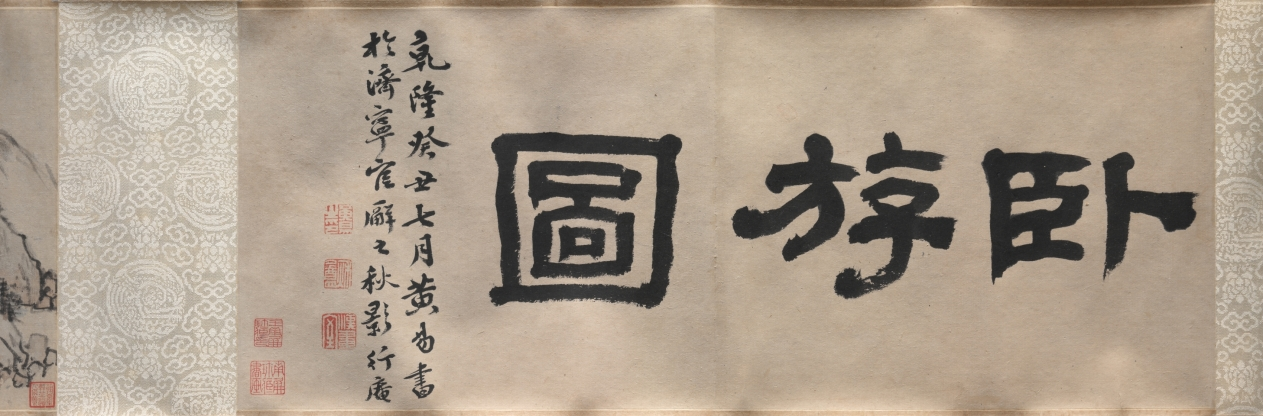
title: Dream Journey among Rivers and Mountains, no. 90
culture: China, Qing dynasty (1644-1911)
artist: Cheng Zhengkui (Chinese, 1604–1676)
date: 1658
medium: Handscroll; ink and color on paper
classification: Painting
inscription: 江山臥遊圖其九十, 青溪道人, 戊戌夏五。 [印] 程正揆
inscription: Title and inscription by Huang Yi 黃易 (1744–1802), and 3 seals.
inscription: 1 colophon and 9 additional seals: 3 seals of Dai Zhi 戴植 (active about 1821–1850); 1 colophon, dated 1914, and 3 seals of Yan Shiqing 顏世清 (1873–1929); 3 seals of Wang Nanping 王南屏 (1924–1985).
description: Cliffs and waterfalls interspersed with trees and dotted vegetation are spread over this handscroll. Long paths wind their way through villages, beside cottages, shrines, and over bridges. In the past, Chinese literati officials liked to take a “dream journey” along mountains and rivers when viewing landscape paintings in their studios. Scenery of this kind thus became a way to escape from the world of bureaucracy and administration. The painter Cheng Zhengkui used the title “Dream Journey” for a whole series of paintings, of which this is number 90. He is said to have painted 500 of them, but the actual count remains unknown.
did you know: Cheng Zhengkui planned to make 100 dream journey paintings but may have ultimately made 500.